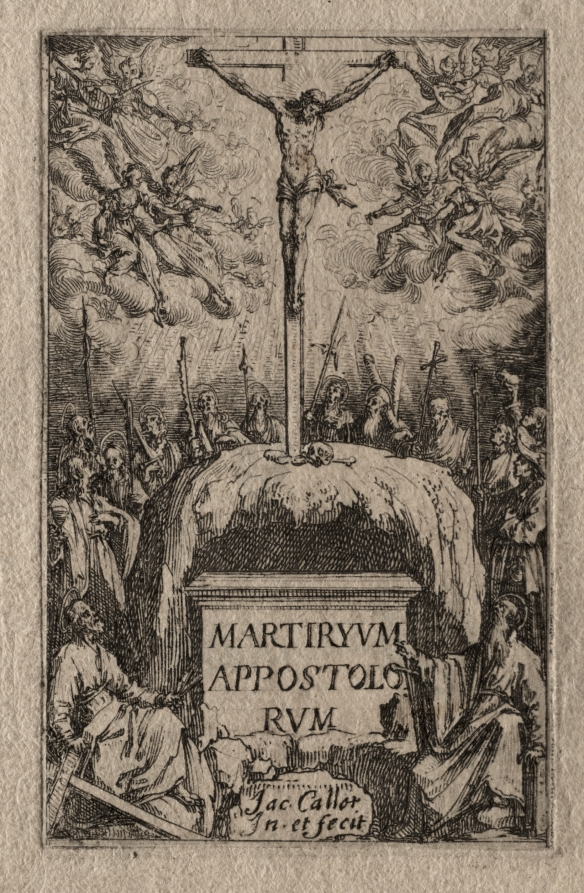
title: The Martyrdom of the Apostles: Frontispiece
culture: France, 17th century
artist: Jacques Callot (French, 1592–1635)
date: ca. 1632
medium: etching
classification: Print